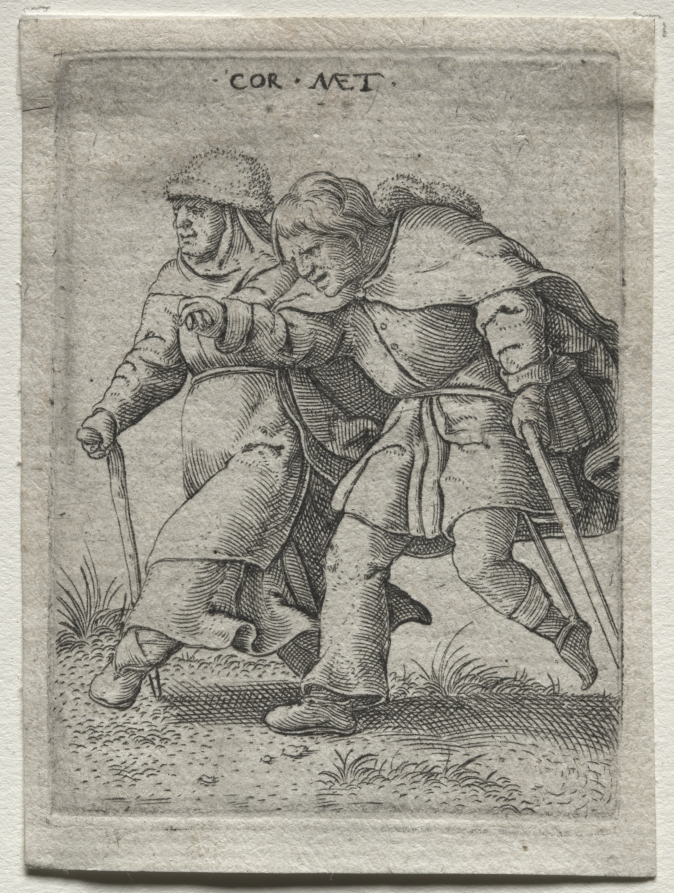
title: Dancing Cripples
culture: Flanders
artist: Cornelis Massys (Flemish, 1510/11–1556/57)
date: 1538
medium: engraving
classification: Print